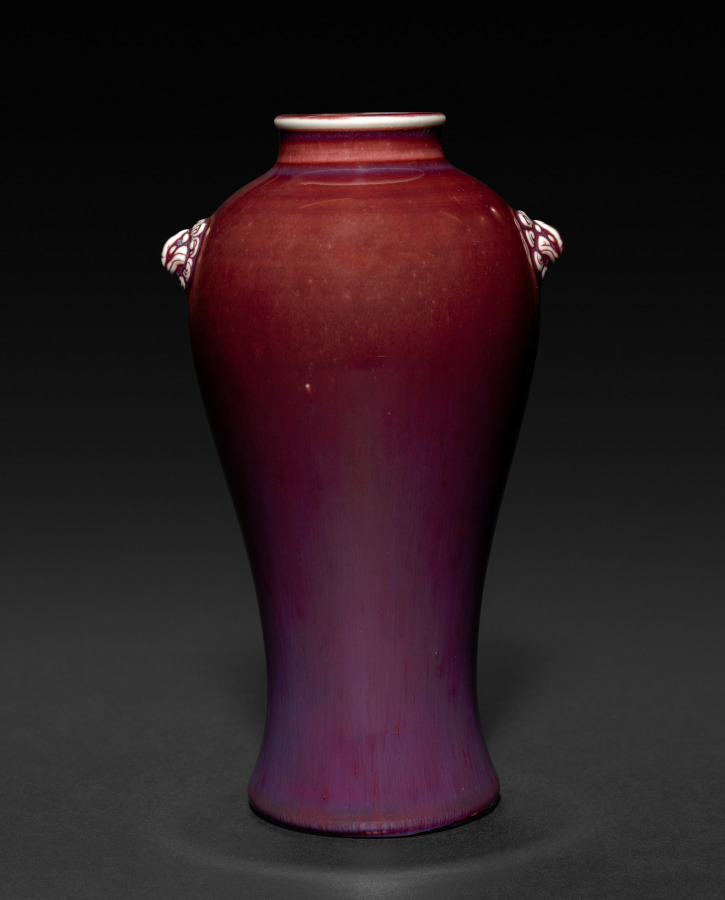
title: Single Stem Vase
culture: Japan, Taishō period (1912–26)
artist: Seifū Yohei IV (Japanese, 1872–1951)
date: 1914–46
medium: Porcelain with molded design and copper-red glaze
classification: Ceramic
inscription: 清風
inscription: 清風造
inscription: 成山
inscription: 清風盧人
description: This vase is copper red in color at the top and becomes purple closer to the bottom, not unlike a Chinese transformation or flambé glaze with mottling and dripping of the glaze. The lip of the vase and much of the lion-head designs remain white. On the box lid, the color of the glaze is called shinsha, which is often glossed as copper red or oxblood, or sometimes cinnabar. Here, it is meant to refer to a Qing-dynasty glazing technique developed in an effort to reproduce a red glaze used during the reign of the Xuande emperor (1426–35) of the Ming dynasty.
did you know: This vase has lion heads for “ears."